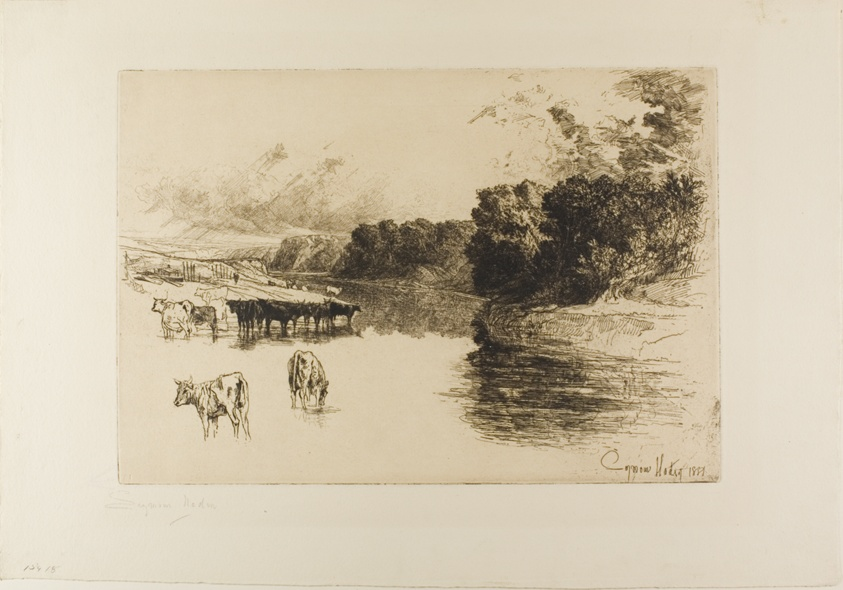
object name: Print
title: A Lancashire River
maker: Francis Seymour Haden (English, 1818-1910)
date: 1881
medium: Etching on cream wove paper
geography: England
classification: etching; print; prints and drawing